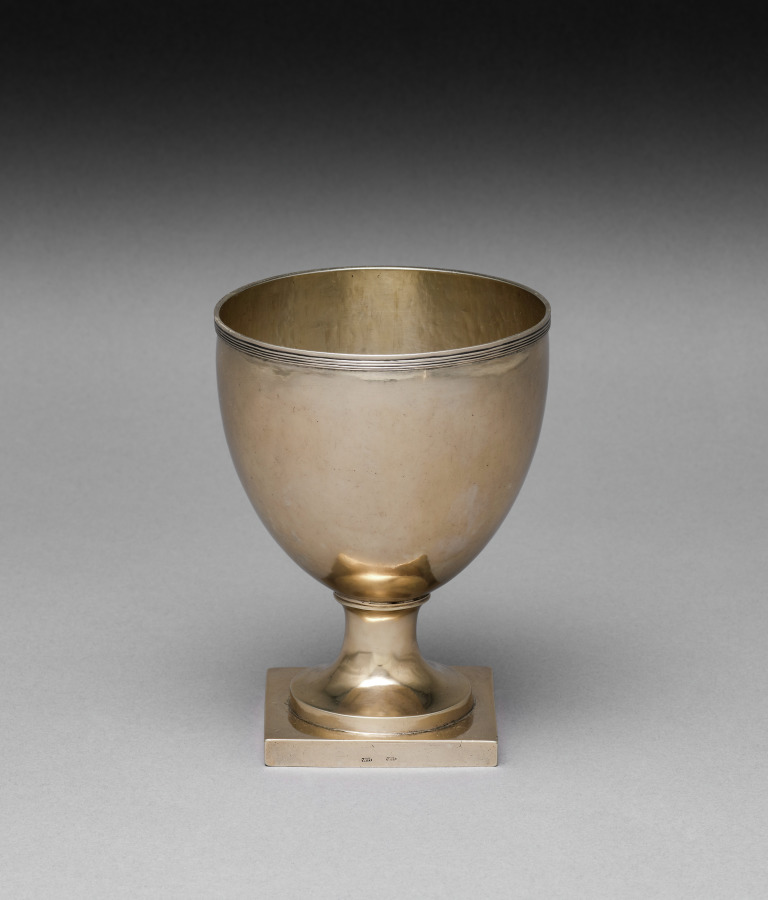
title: Sugar Bowl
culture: America, Pennsylvania, Philadelphia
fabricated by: William Haverstick (American, 1756–1823)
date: c. 1800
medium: silver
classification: Silver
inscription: engraved "MP" in bright-cut script on body.